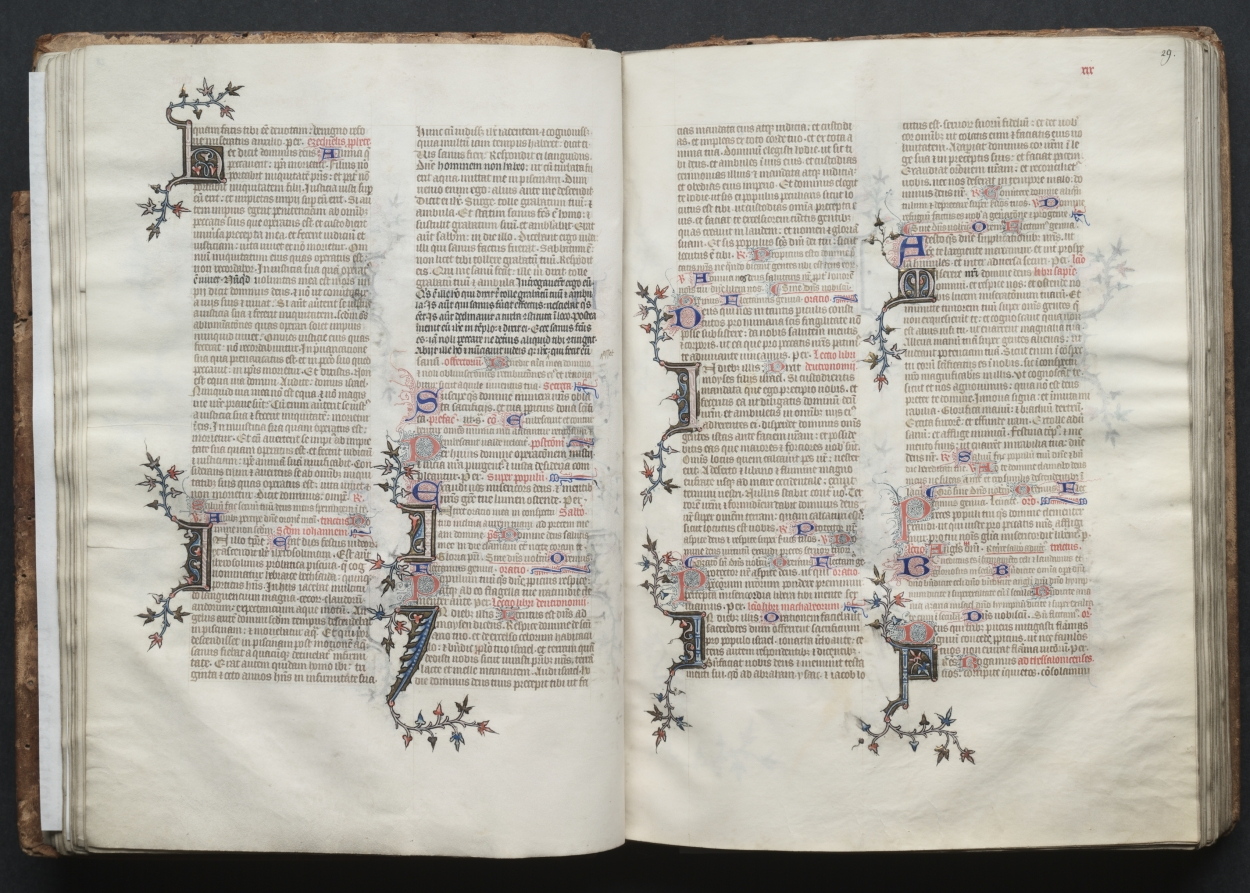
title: The Gotha Missal: Fol. 28v, Text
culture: France, Paris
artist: Master of the Boqueteaux (French)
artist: and Workshop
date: c. 1375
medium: ink, tempera, and gold on vellum; blind-tooled leather binding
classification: Bound Volume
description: The style and quality of this manuscript's decoration is typical of deluxe Parisian books made for aristocratic or royal patrons. Most of the book's decoration appears to be the work of the Master of the Boqueteaux, an artist active at the court of King Charles V (died 1380). His style was apparently shared by a number of book illuminators working in and around Paris. It is very possible that the Gotha Missal belonged to Charles V, but is not provable because the manuscript has no royal portraits and lacks a colophon. Given the book's magnificent decoration, however, it would seem that it was produced for a Valois prince, if not for the king himself. The manuscript receives its name from the German dukes of Gotha, its later owners.